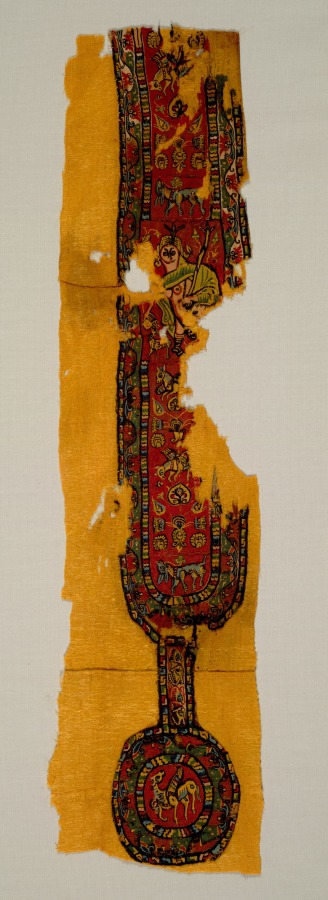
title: Decorations and Sleeve from a Tunic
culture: Egypt, Umayyad period (661–750) or Abbasid period (750–1258)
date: 700s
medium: wool; plain weave with slit-tapestry weave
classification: Textile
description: Figures and winged animals from ancient Greece and Rome remained popular during the early Islamic period of the Umayyad and Abbasid dynasties. The naked figure could represent Dionysus, the Greek god of wine; he holds his thyrsus, a staff decorated with ivy leaves and pinecones, while pouring liquid from a small jug for the panther. These colorful designs probably adorned the sleeve and front or back of a tunic, a garment worn directly on the body for over 1,000 years, from Roman antiquity to the Middle Ages. Popular decorations were regularly reused and sewn onto new tunics, as can be seen on this winter garment made of wool.